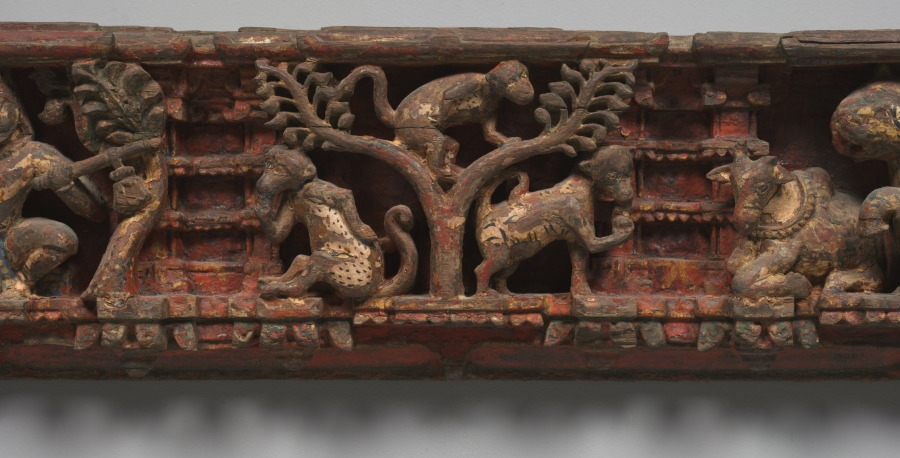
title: Narrative Frieze: Forest Retreat with Animals - Architrave from a Jain Temple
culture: India, Gujarat, 16th-17th century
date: 1500s–1600s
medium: wood with traces of color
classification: Sculpture